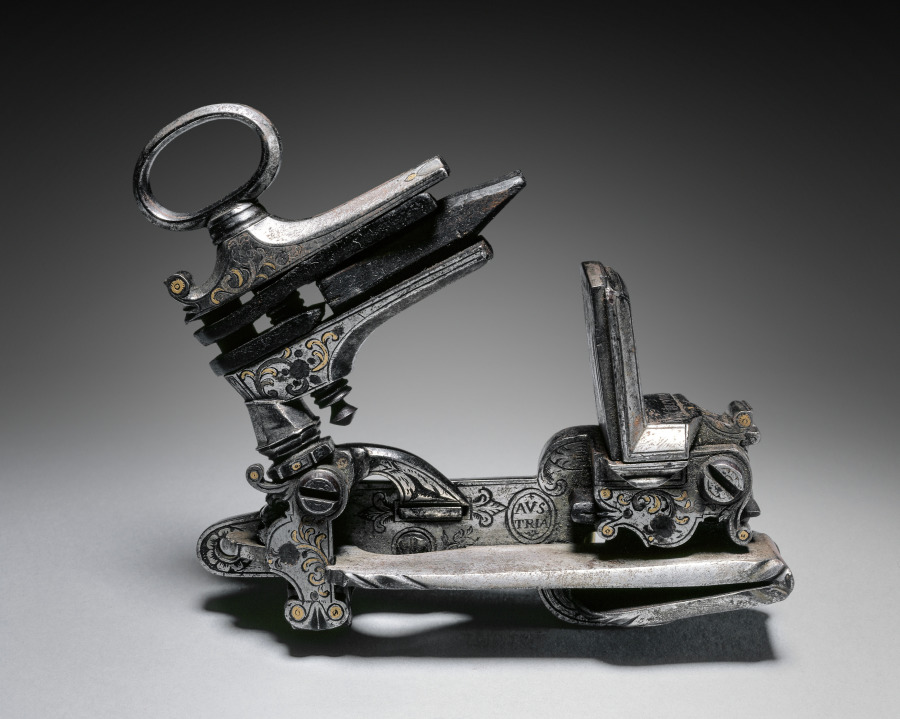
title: Miquelet Lock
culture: Spain, late 17th Century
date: late 1600s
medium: steel, inlaid with gold and silver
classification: Arms and Armor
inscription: on plate: AVS/TRIA; on frizzen: En Cordova